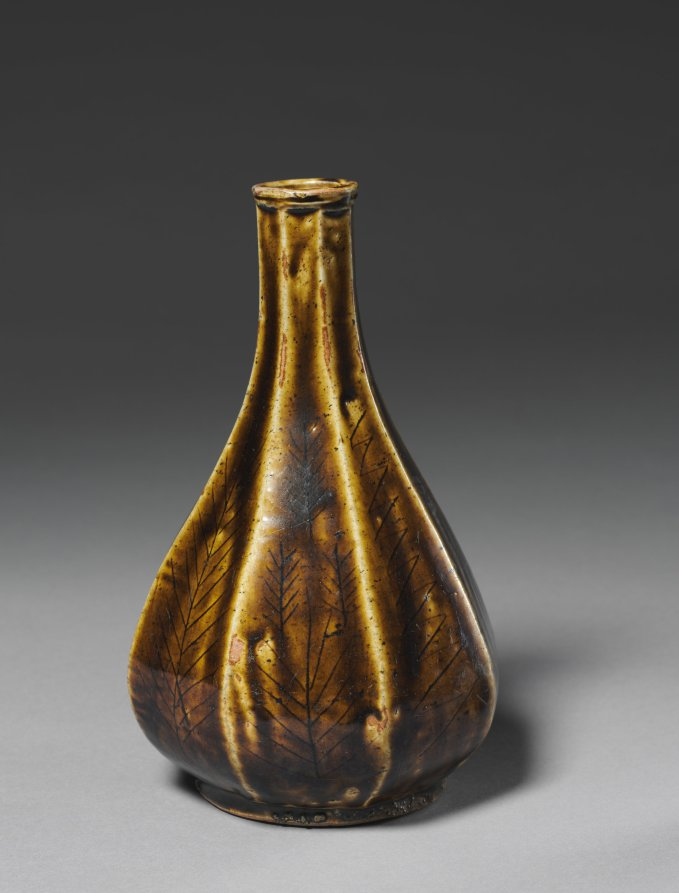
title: Eight-faceted Bottle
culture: Korea, Joseon dynasty (1392–1910)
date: 1800s-1900s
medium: stoneware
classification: Ceramic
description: Toward the end of the 1700s, multifaceted bottles like this one became popular with the growing demand from both the elites as well as the middle class. The dark-brown iron oxide pigment makes this eight-faceted bottle earthy, yet sophisticated.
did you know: The exquisite hue of this bottle is from iron oxide, also known as “purple oxide.”